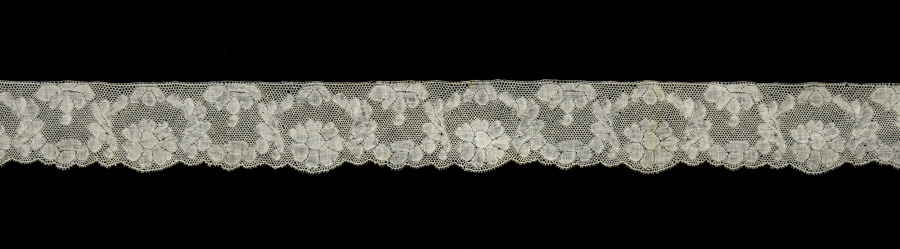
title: Lace Edging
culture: France, Valenciennes or Flanders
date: 1700s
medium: Linen: bobbin lace (Valenciennes)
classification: Lace